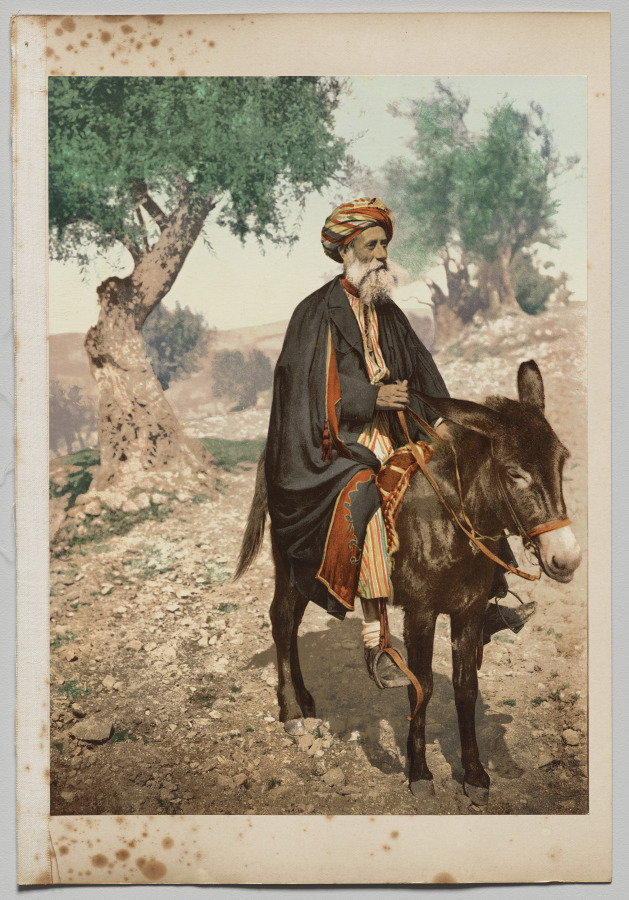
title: Femmes musulmanes Syriennes à Beyrouth, Costume de Ville (Man on a Donkey)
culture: France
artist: Félix Bonfils (French, 1831–1885)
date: c. 1880s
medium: Photochrom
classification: Photograph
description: To make a photochrom, a photographic negative was transferred onto a lithographic stone, then printers created a minimum of six and up to fifteen different stones, each with a single color of ink, which were printed atop the black-and-white image. The printers creating the colors had never seen the original locale. Photochroms were popular from the 1890s into the 1910s and were most often collected in albums or framed and hung on the wall.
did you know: In the early 1880s,FélixBonfils was among the first photographers to use the Photocrom process, which producedcolor images from a single black-and-white negative.